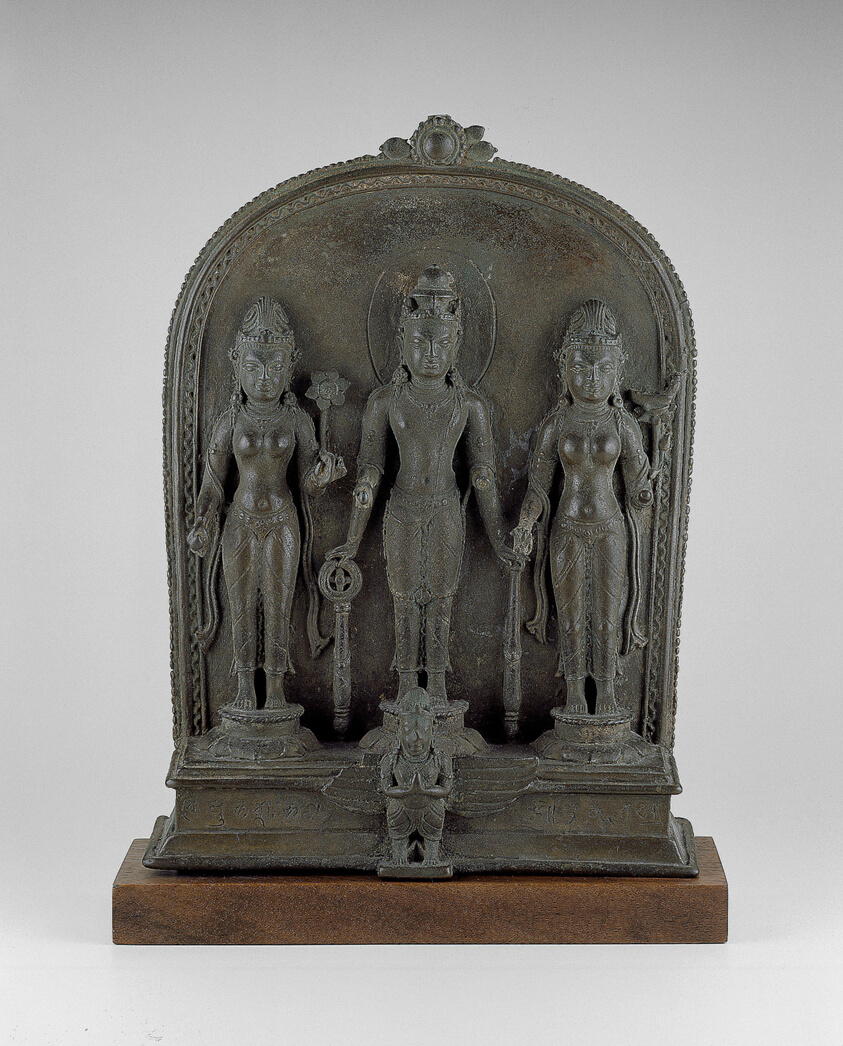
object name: Sculpture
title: God Vishnu with Lakshmi and Sarasvati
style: South Asian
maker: Bangladesh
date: Pala period, 9th/10th century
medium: Bronze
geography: Bangladesh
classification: metal; sculpture; asian art